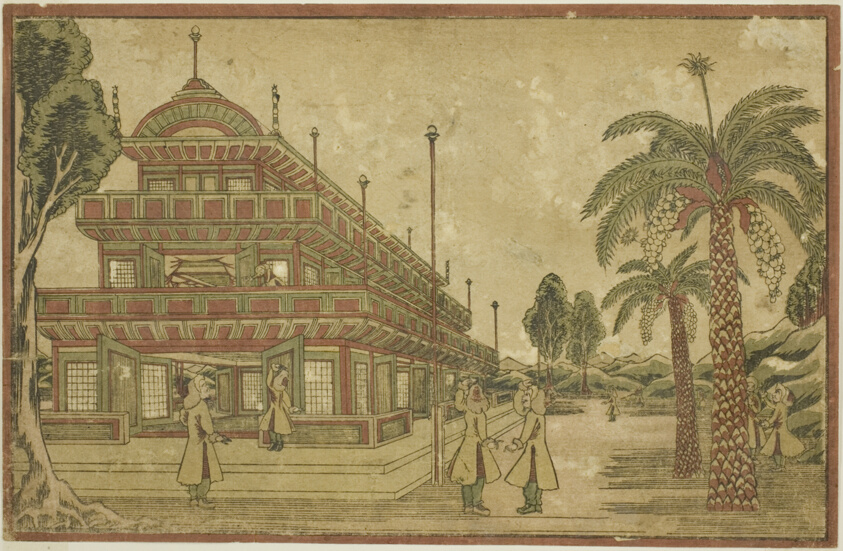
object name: Print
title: Newly Published Dutch Perspective View: The Tomb of King Mausolus in Asia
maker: Utagawa Kuninaga (Japanese, 1788-1829)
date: c. 1824/25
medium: Color woodblock print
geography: Japan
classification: print; asian art